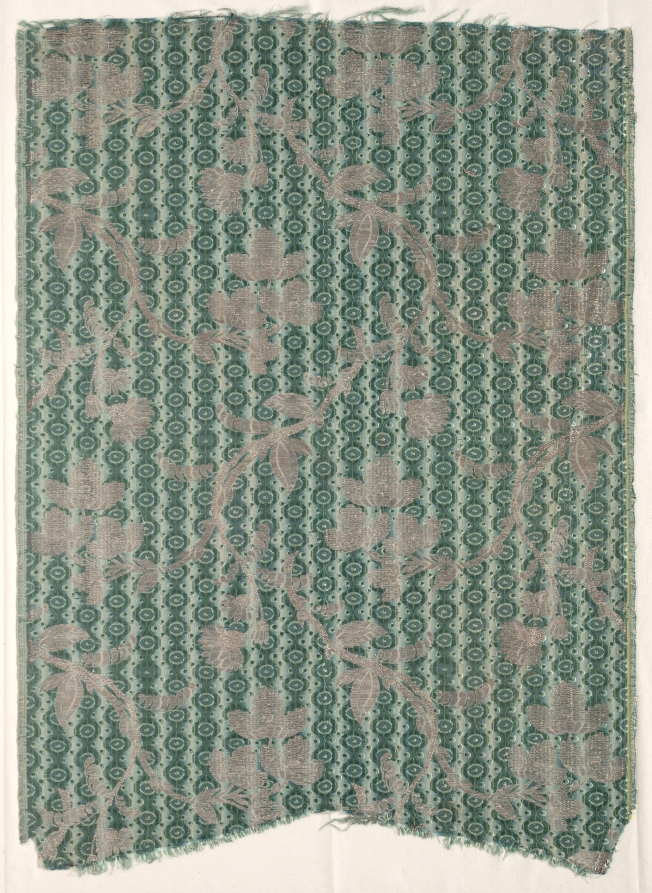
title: Silk Brocaded Textile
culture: France, 18th century, Period of Louis XVI (1774-1793)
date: 1774–1793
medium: brocade; silk and metal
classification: Textile